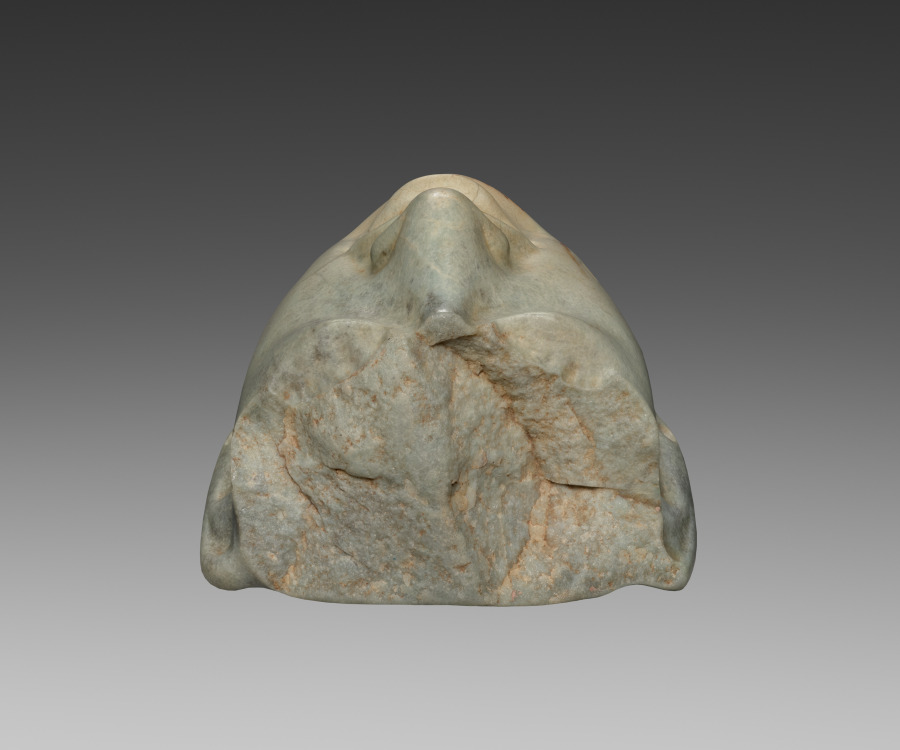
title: Head Fragment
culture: Mesoamerica, Mexico, Olmec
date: c. 900–300 BCE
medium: jadeite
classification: Jade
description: This sensual head fragment may come from a seated or standing figure like those shown nearby, though much larger. The carving is exceptionally fine, from the slight under-eye puffiness to the delineation of the fleshy lips and the teeth. The profile face of supernatural being is incised just in front of each ear, perhaps indicating that the subject had special power.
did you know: In ancient Mesoamerica, jade was more valuable than gold.